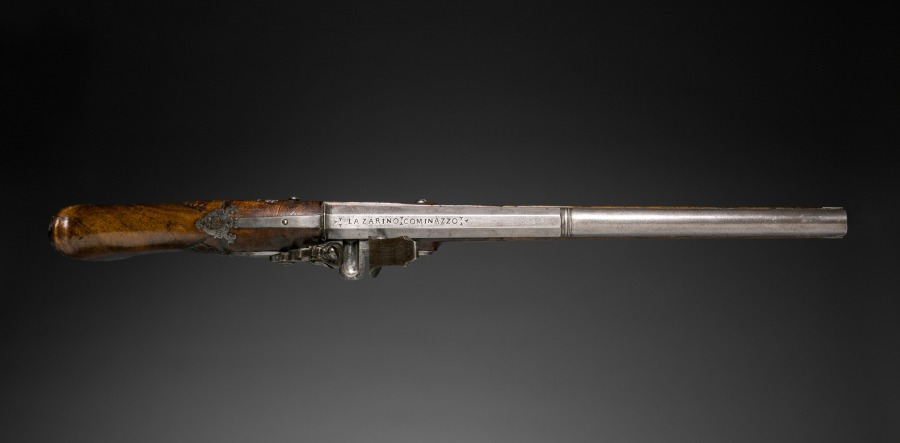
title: Flintlock Pistol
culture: Italy, Brescia, late 17th century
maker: Gio Borgognone (Italian)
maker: Lazarino Cominazzo (Italian)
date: c. 1690–1700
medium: steel, chiseled steel with walnut stock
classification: Arms and Armor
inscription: barrel signed: Lazarino Cominazzo; lockplates signed: Gio Borgognone in Bresia